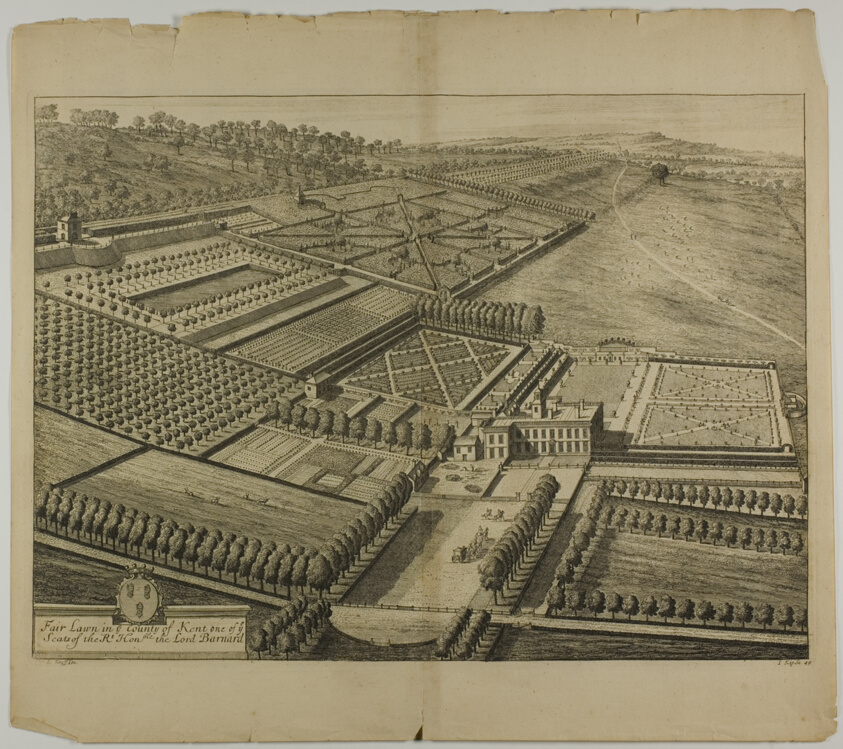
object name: Print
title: Fair Lawn in the County of Kent, plate 49 from Britannia Illustrata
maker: Jan Kip (Dutch, c. 1653-1722); after Leonard Knyff (Dutch, 1650-1721); published by David Mortier (French, 1673-1728)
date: published 1707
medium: Etching, with engraving, in black on cream laid paper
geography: Netherlands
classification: prints and drawing; engraving; etching; print